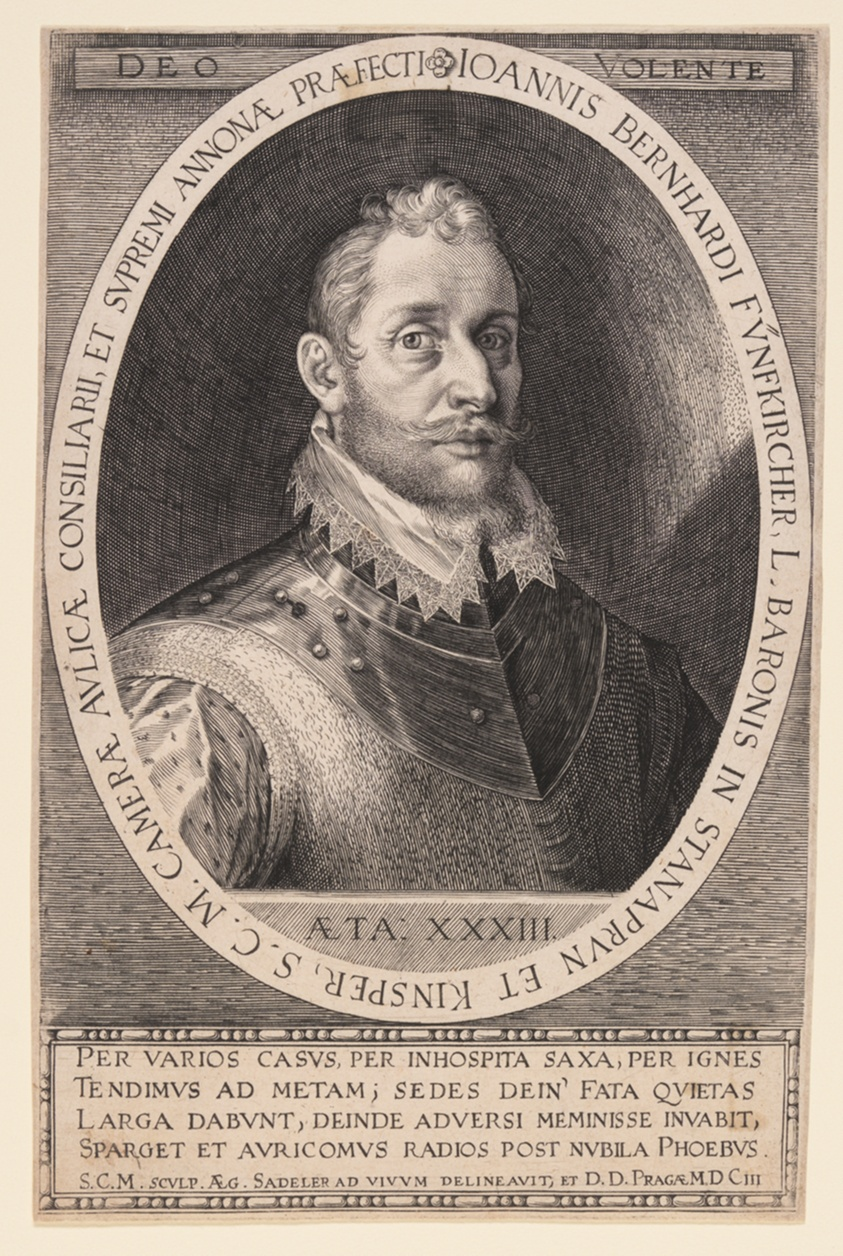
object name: Print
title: Johannes Bernhardt Fünfkircher, Baron of Stanaprun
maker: Aegidius Sadeler II; Flemish, c. 1570–1629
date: 1603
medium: Engraving on paper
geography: Flanders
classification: engraving; paper; print; prints and drawing